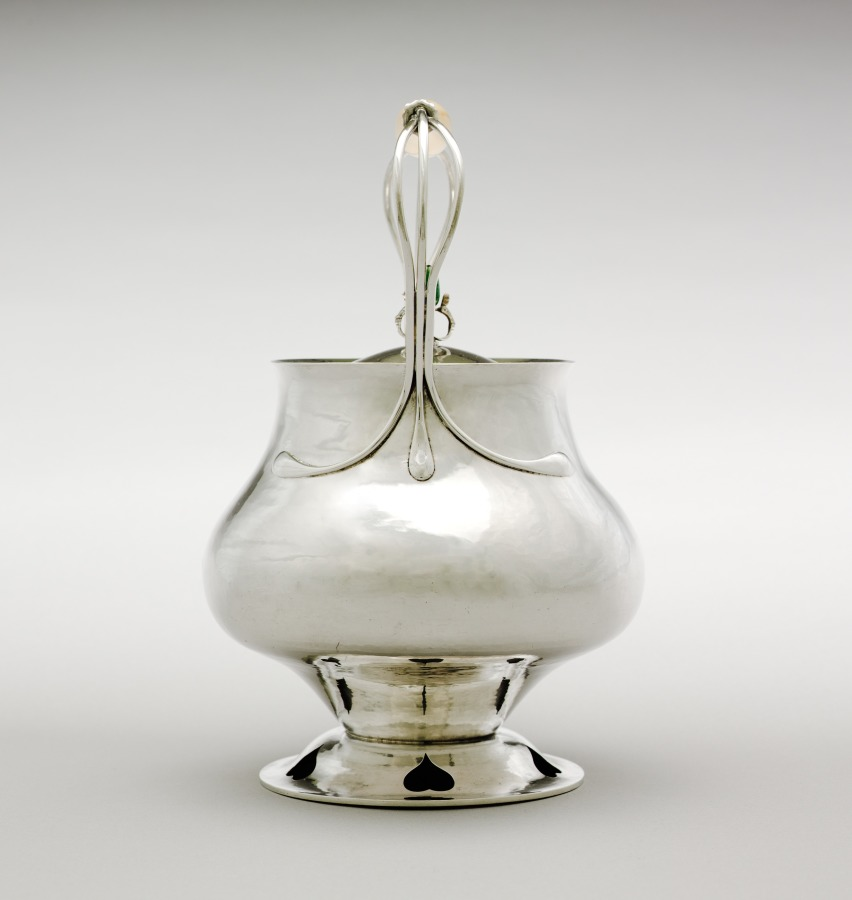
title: Kettle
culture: England, late 19th-early 20th Century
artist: Charles Robert Ashbee (British, 1863–1942)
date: 1900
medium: silver with ivory handle and chrysoprase finial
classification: Silver